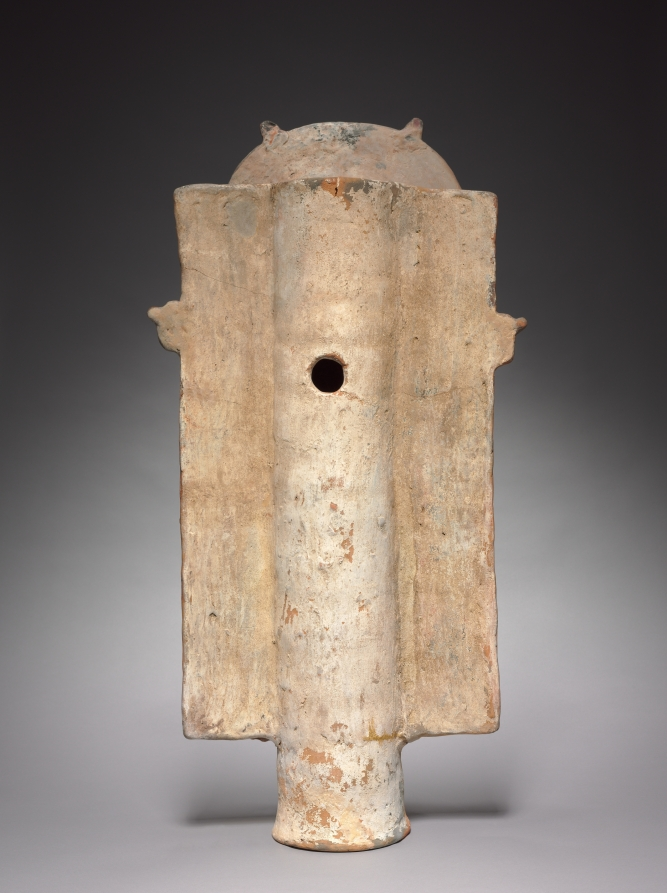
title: Incensario (Incense Burner) Support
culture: Mesoamerica, Maya, Palenque region, Classic Period (250-900) or modern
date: 600–900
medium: earthenware with pigments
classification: Sculpture